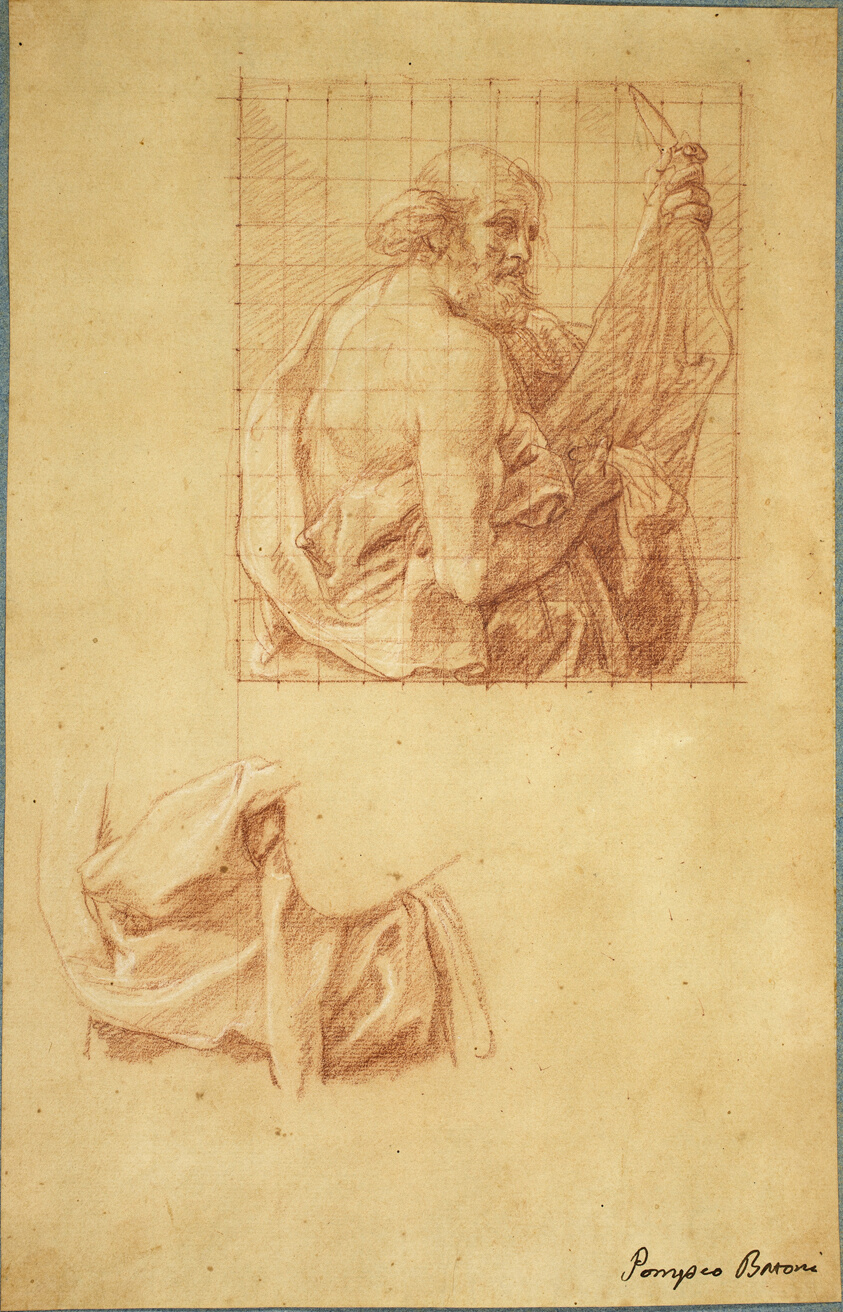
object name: Drawing and Watercolor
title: Study for Saint Bartholomew and Drapery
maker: Pompeo Girolamo Batoni (Italian, 1708-1787)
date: c. 1740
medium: Red chalk, heightened with white chalk, on beige laid paper, squared for transfer with red chalk, edge mounted to blue wove card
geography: Italy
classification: prints and drawing; chalk; drawings (visual works)